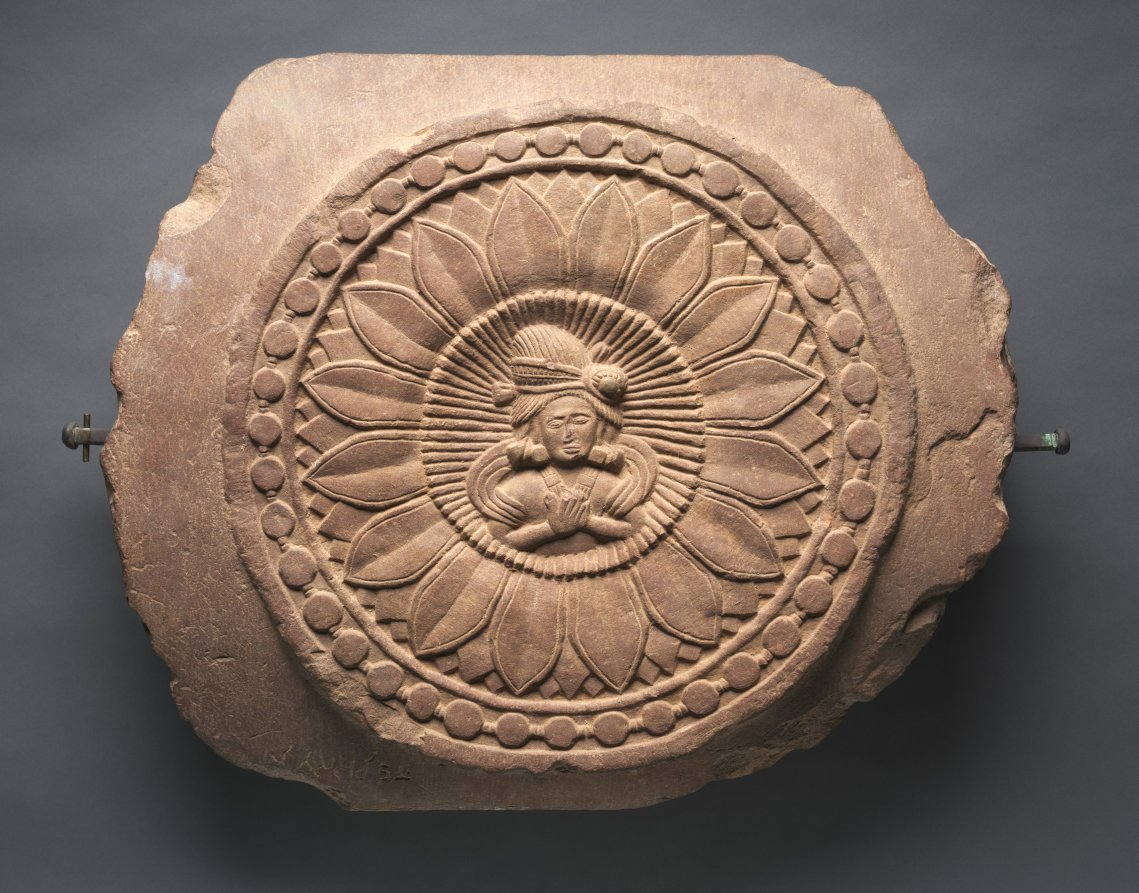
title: Double-Faced Crossbar from a Railing: Male Worshipper (recto)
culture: India, Madhya Pradesh, Bharhut, Shunga period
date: c. 150 BCE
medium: plum-colored sandstone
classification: Sculpture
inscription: Inscribed on recto: "Mitasa suchi danam"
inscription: Mitasa suchi danam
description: A well-dressed male figure, probably a nature divinity known as a yaksha, presses his hands together in a gesture of veneration in the center of the lotus medallion. An inscription in Brahmi script states that this section of the railing was the gift of a man named Mitra.